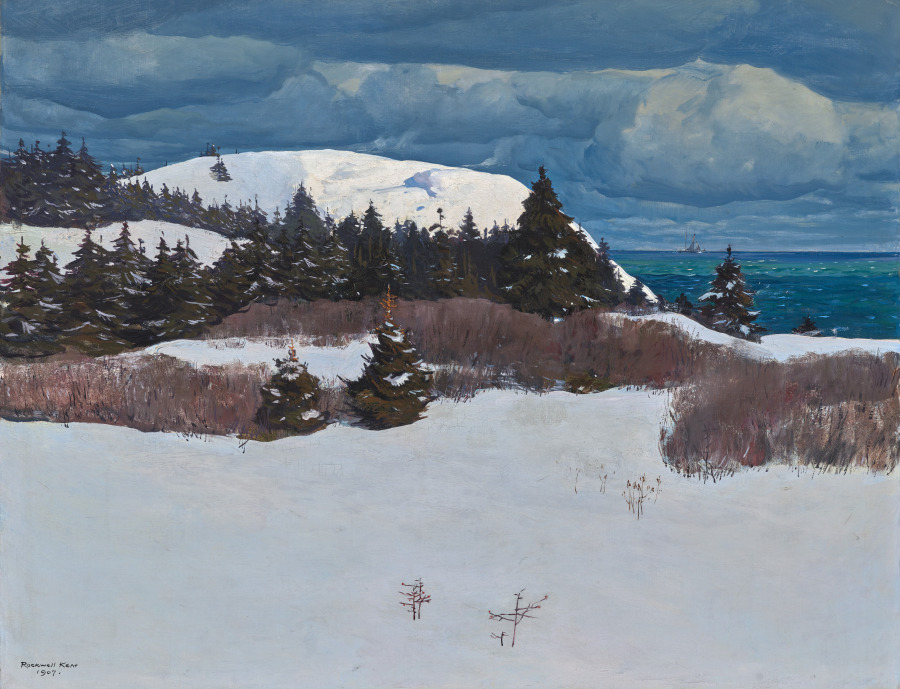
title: Maine Coast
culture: America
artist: Rockwell Kent (American, 1882–1971)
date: 1907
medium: oil on canvas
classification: Painting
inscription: signed lower left: Rockwell Kent / 1907.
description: Located off the coast of Maine, Monhegan Island has long drawn artists attracted to its rugged headlands, brooding forests, and dramatic ocean vistas. Unlike most colleagues who visited during summer, Kent built a home and lived there year-round, working as a well digger, lobsterman, and carpenter from 1906–8. This boldly rendered winter scene was painted from his studio window.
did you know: Kent loved to paint landscapes in cold, remote areas, including Maine, Alaska, Newfoundland, and Greenland.